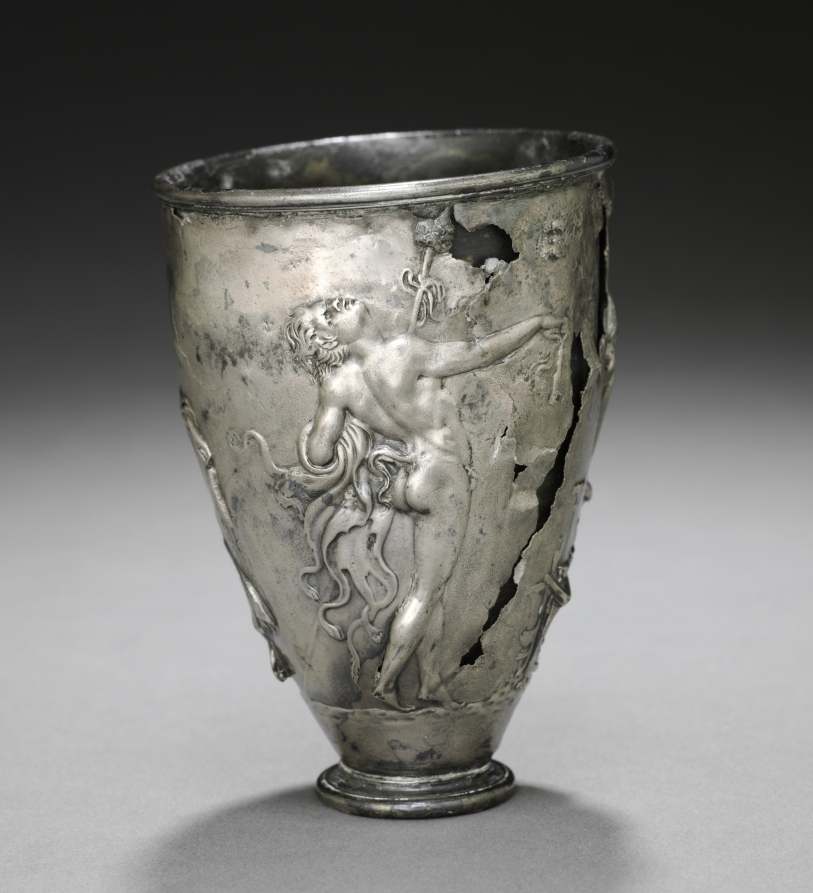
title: The Vicarello Goblet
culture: Italy, Vicarello (ancient Aquae Apollinares), Roman, Augustan period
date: 25 BCE–25 CE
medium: silver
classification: Metalwork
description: This masterpiece of the Roman silversmith’s art is exquisitely worked in relief. The multifigure scene centers on a rustic shrine of the ithyphallic fertility god Priapus, son of Dionysos. He takes the form of a stylized boundary marker atop a column, where a woman seems to have brought him to life by touching him. To the left sits a table with votive offerings to the god. Flanking the shrine are a satyr and maenad, dancing ecstatically.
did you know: This silver cup was found north of Rome at Vicarello (ancient Aquae Apollinares), probably in 1862.